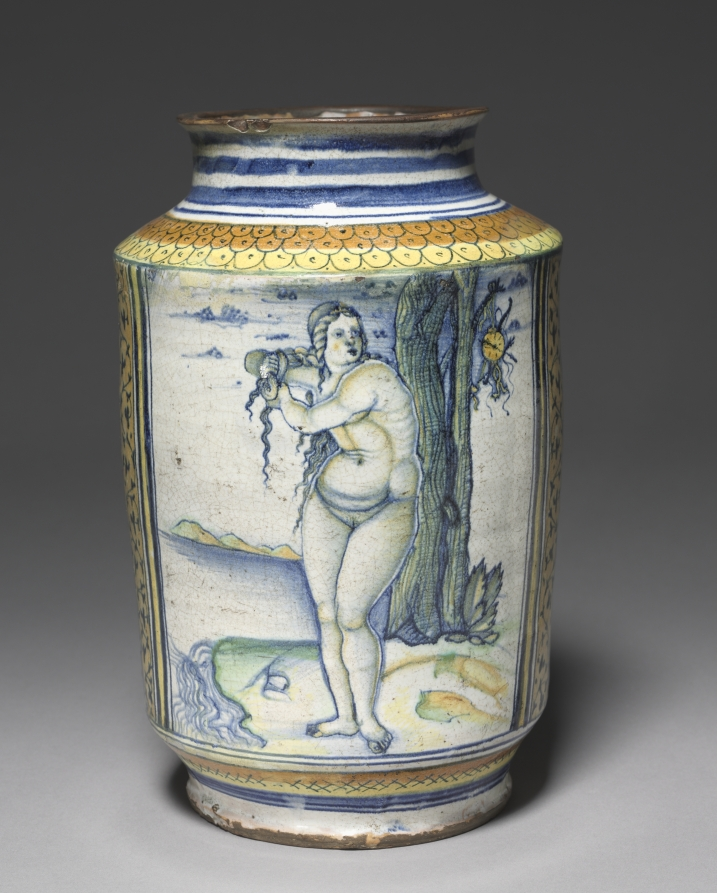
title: Cylindrical Storage Jar: Venus on the Sea Shore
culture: Italy, Faenza, 16th century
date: c. 1507–10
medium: tin-glazed earthenware (maiolica)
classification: Ceramic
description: The scene depicted on this vessel, the goddess Venus emerging from the sea and drying her hair, is based on an engraving by Marcantonio Raimondi dated September 11, 1506.